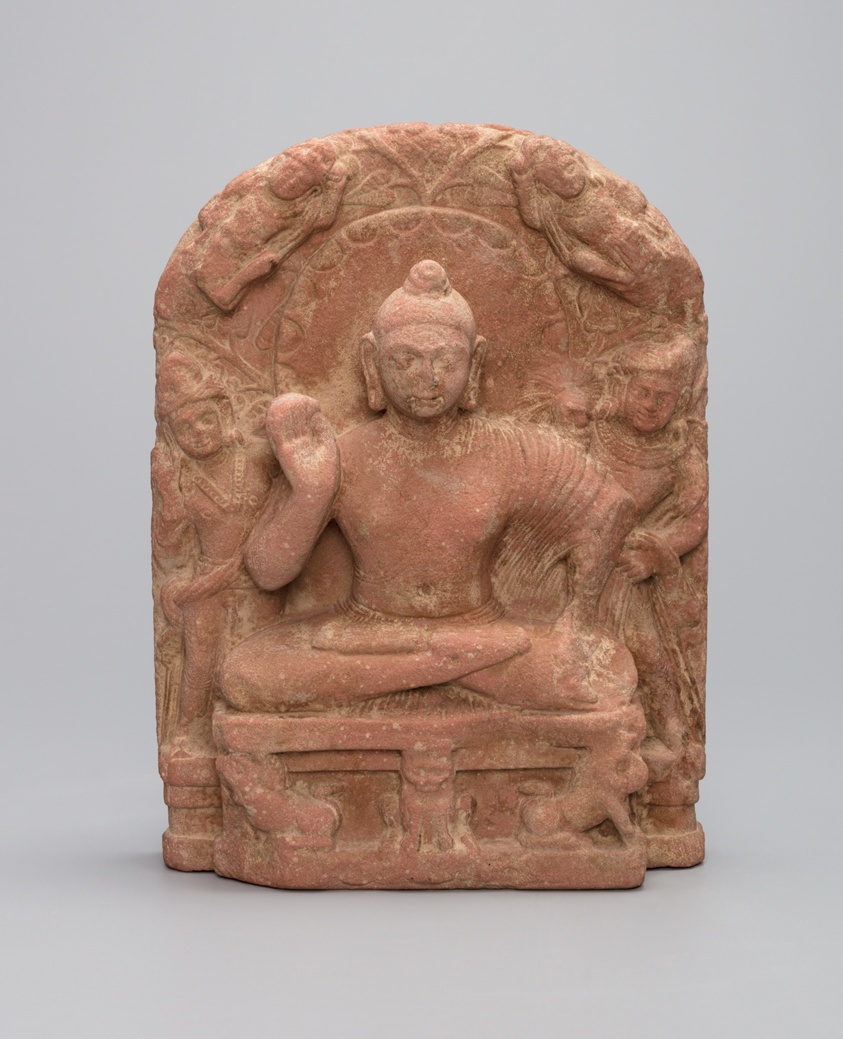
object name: Sculpture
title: Buddha Shakyamuni with Attendants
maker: India; Uttar Pradesh, Mathura region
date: Kushan period, 2nd century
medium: Sandstone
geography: Mathura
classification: sandstone; stone; sculpture; asian art